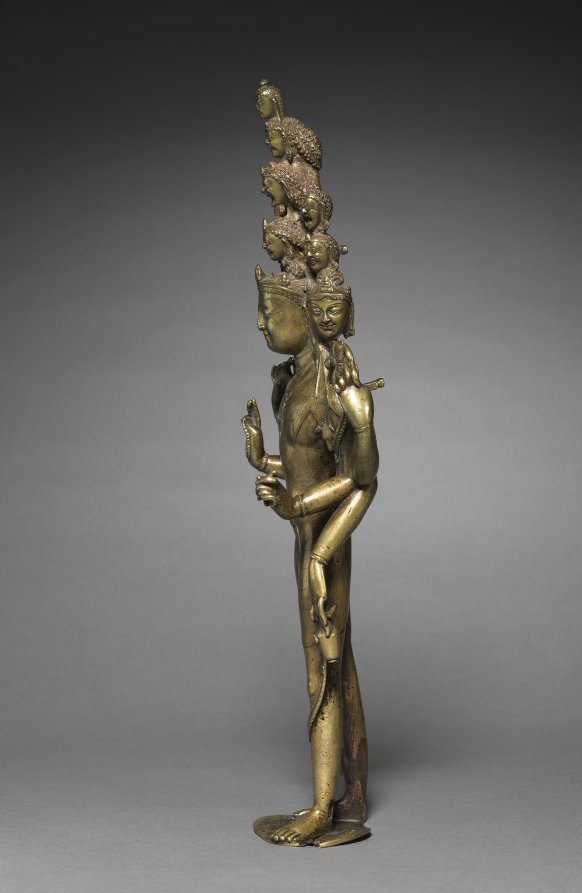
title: Eleven-Headed Bodhisattva of Compassion (Avalokiteshvara)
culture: Western Himalayas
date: around 1000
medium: gilt bronze with silver and copper inlay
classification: Sculpture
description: One of the finest surviving examples of its kind, this rare six-armed form of Avalokiteshvara has the slender athletic figure and penetrating expression associated with the art of Kashmir, the main source for western Tibetan styles. This Bodhisattva combines the qualities of a prince and an ascetic, with his crown and jewels combined with the yogi's antelope skin over his left shoulder and prayer beads in his middle right hand. Representing the range of Avalokiteshvara's forms and aspects, his eleven heads are remarkably articulated with individualized features. They follow textual descriptions that describe his three placid faces, three fierce faces, three terrifying howling faces, and one laughing face, all surmounted by a head of the Buddha Amitabha, with whom he is closely associated. Tongues and lips have been inlaid with copper to extraordinary effect, and a miniature seated figure of Amitabha Buddha has been placed in the center of every crown.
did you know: The bottle in his lower-left hand contains the nectar of immortality.